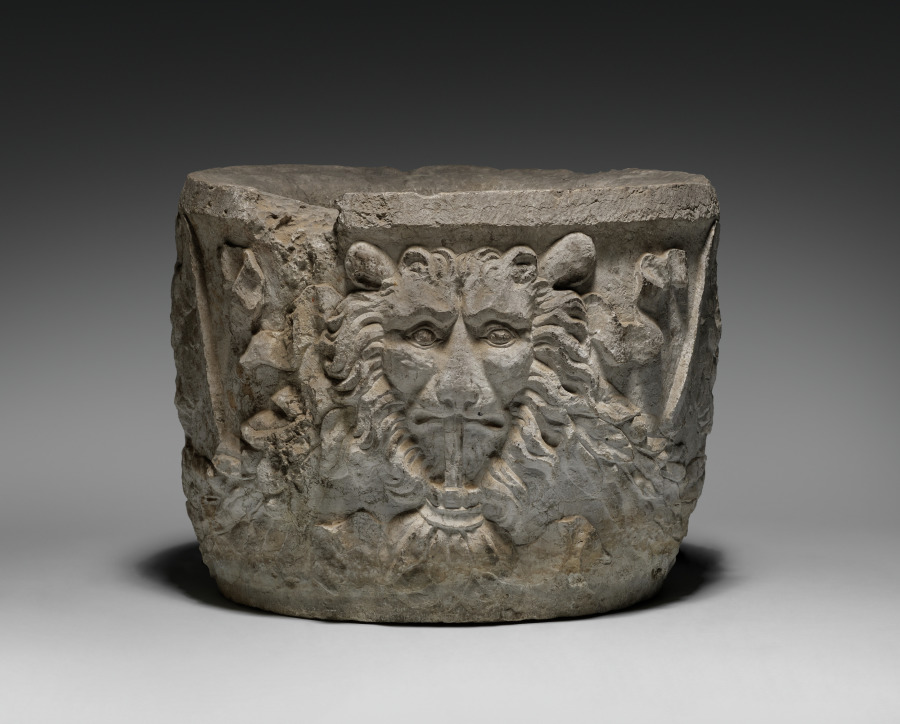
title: Garden Pot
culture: Italy, 19th century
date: 19th Century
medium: stone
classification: Miscellaneous